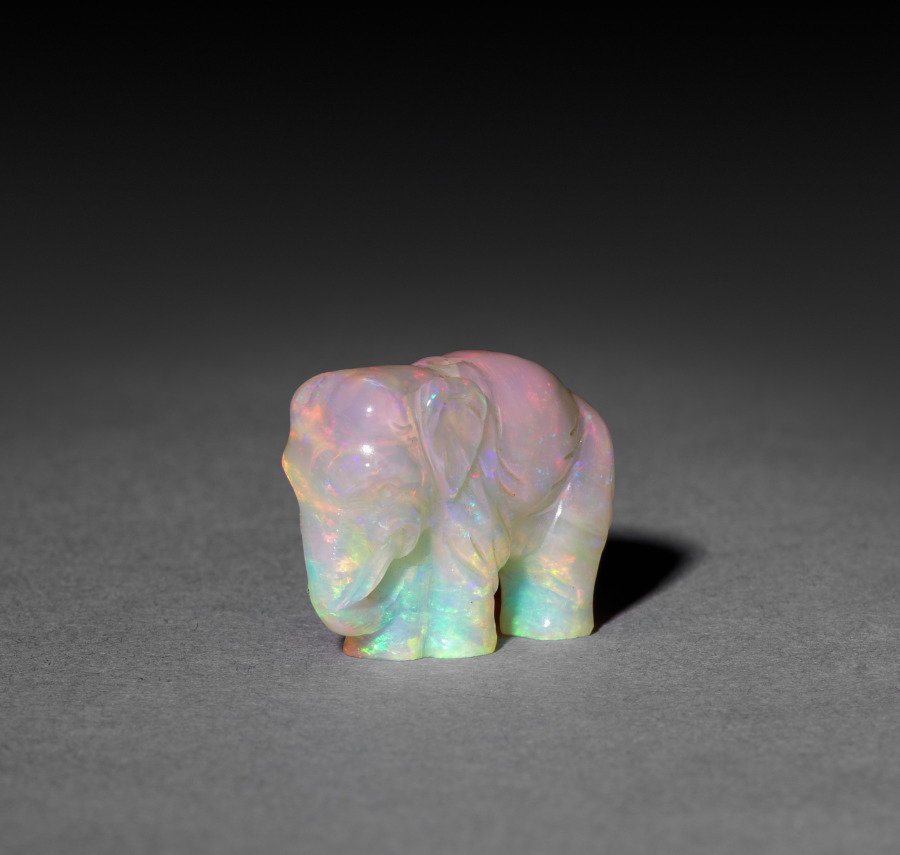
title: Elephant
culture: Russia, St. Petersburg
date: late 1800s-early 1900s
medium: opal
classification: Miscellaneous